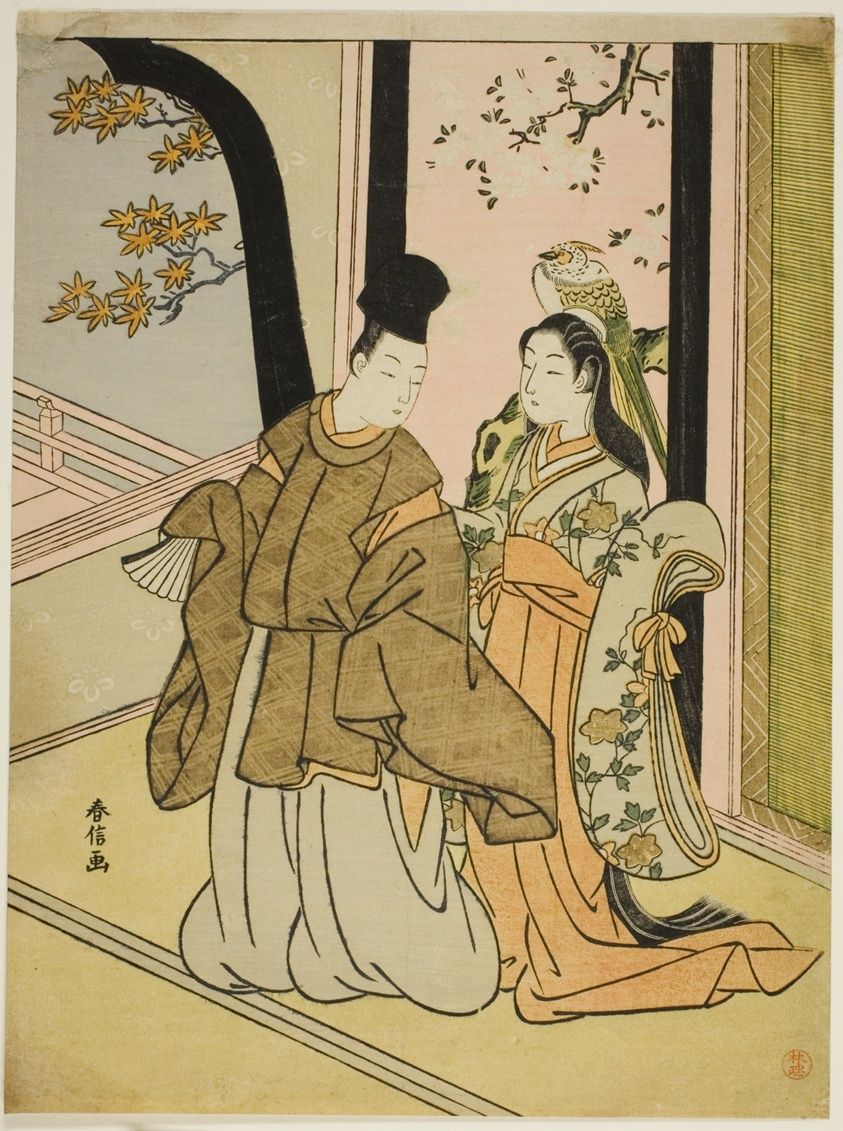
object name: Print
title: Courtier and Lady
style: Japanese (culture or style)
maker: Suzuki Harunobu 鈴木 春信; Japanese, 1725 (?)-1770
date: c. 1768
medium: Color woodblock print; chuban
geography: Japan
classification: print; asian art